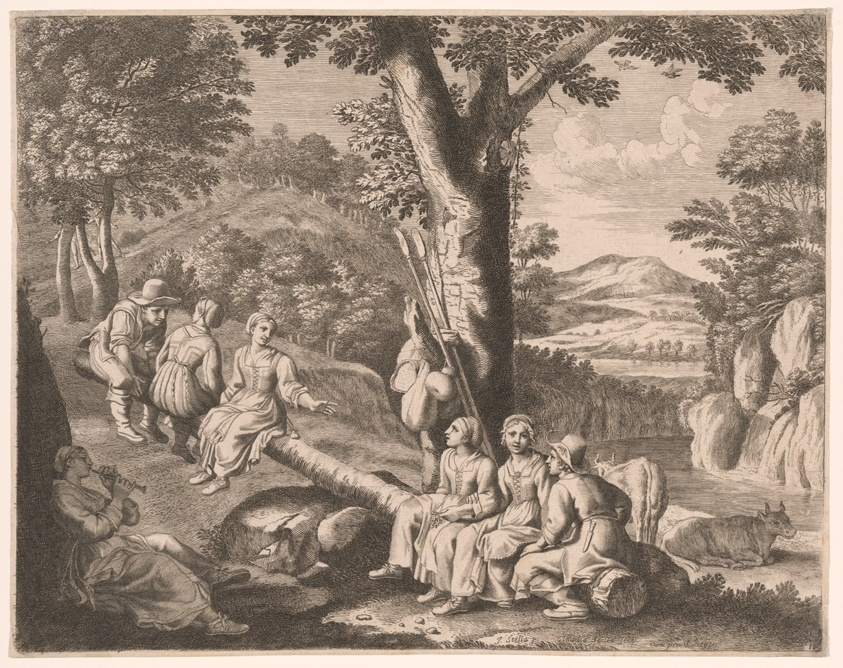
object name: Print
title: The Swing, Plate 11 from Pastorales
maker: Claudine Bouzonnet-Stella (French, 1636–1697); after Jacques Stella (French, 1596-1657)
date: 1667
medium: Etching in black on cream laid paper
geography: France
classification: prints and drawing; paper; etching; print